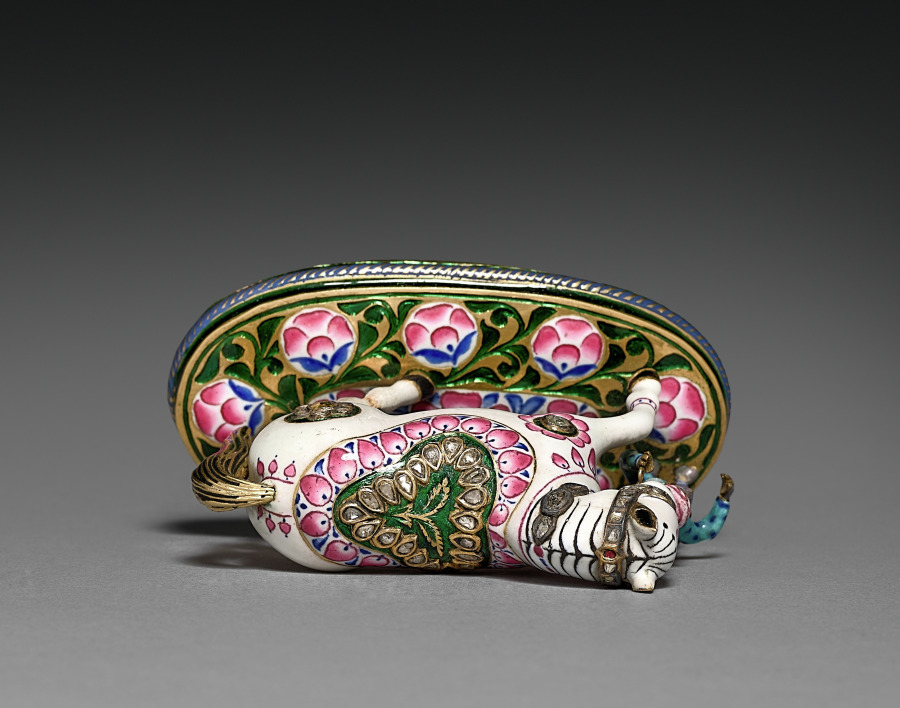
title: Ladies Hand Mirror with Horse as Handle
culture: India, Jaipur, late 18th-19th Century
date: late 1700s-1800s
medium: enamel inlaid with semi-precious stones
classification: Enamel